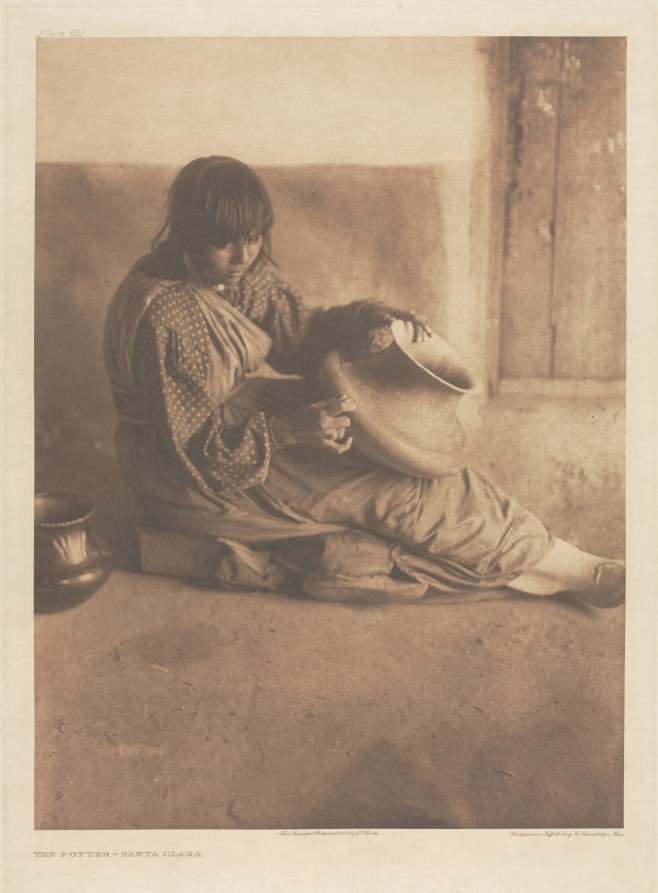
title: Portfolio XVII, Plate 602: The Potter - Santa Clara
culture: America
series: The North American Indian: being a series of Portfolios picturing and describing the Indians of the United States, the Dominion of Canada, and Alaska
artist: Edward S. Curtis (American, 1868–1952)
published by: The University Press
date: 1905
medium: photogravure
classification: Portfolio